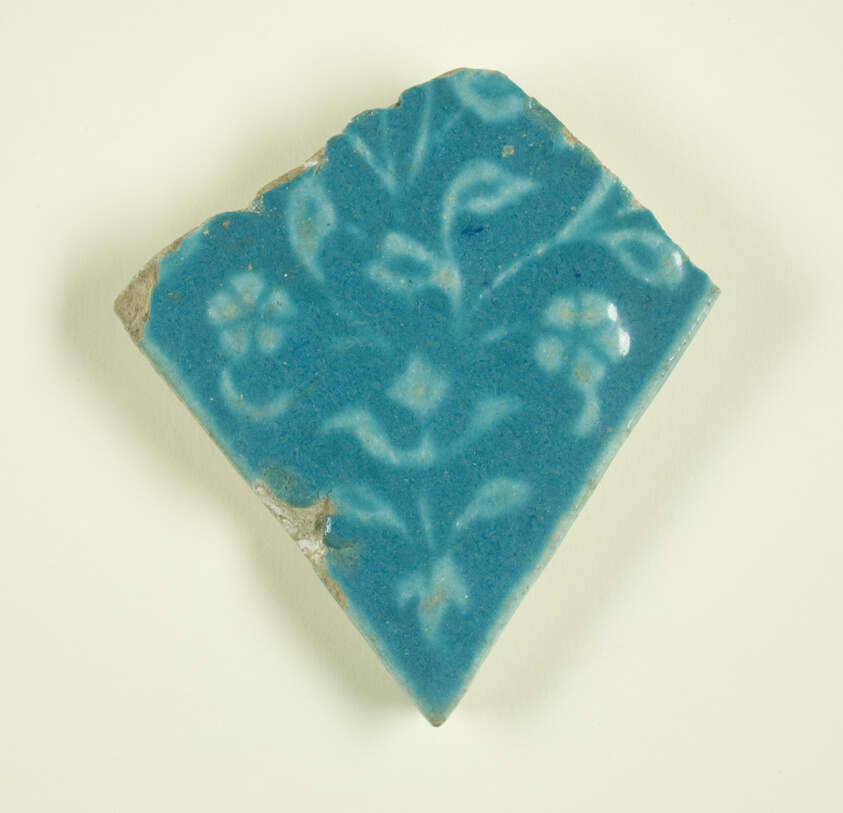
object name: Architectural fragment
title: Tile with Moulded Floral Design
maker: Iran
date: 14th/15th century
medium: Fritware with molded decoration under opaque turquoise glaze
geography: Iran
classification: ceramics; fragment; asian art; architectural fragment